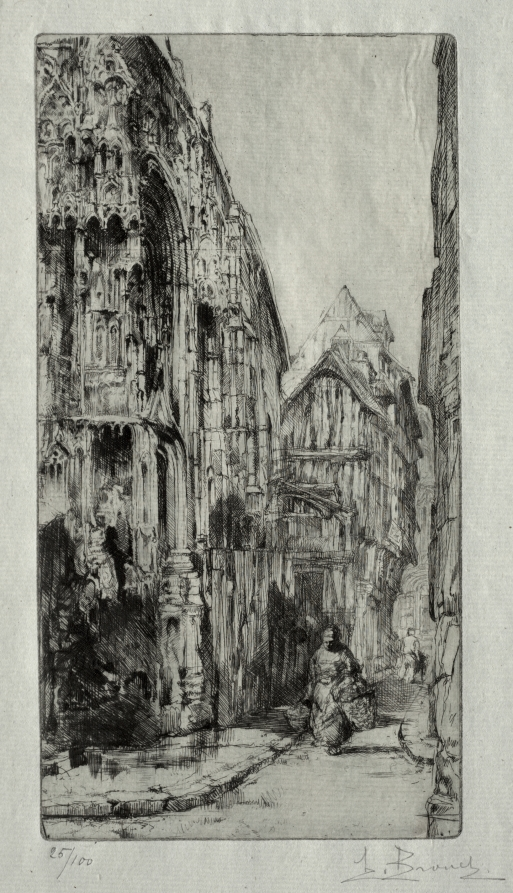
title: Saint-Etienne des Tonneliers a Rouen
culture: France, 20th century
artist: Auguste Brouet (French, 1872–1941)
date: before 1925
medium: etching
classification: Print